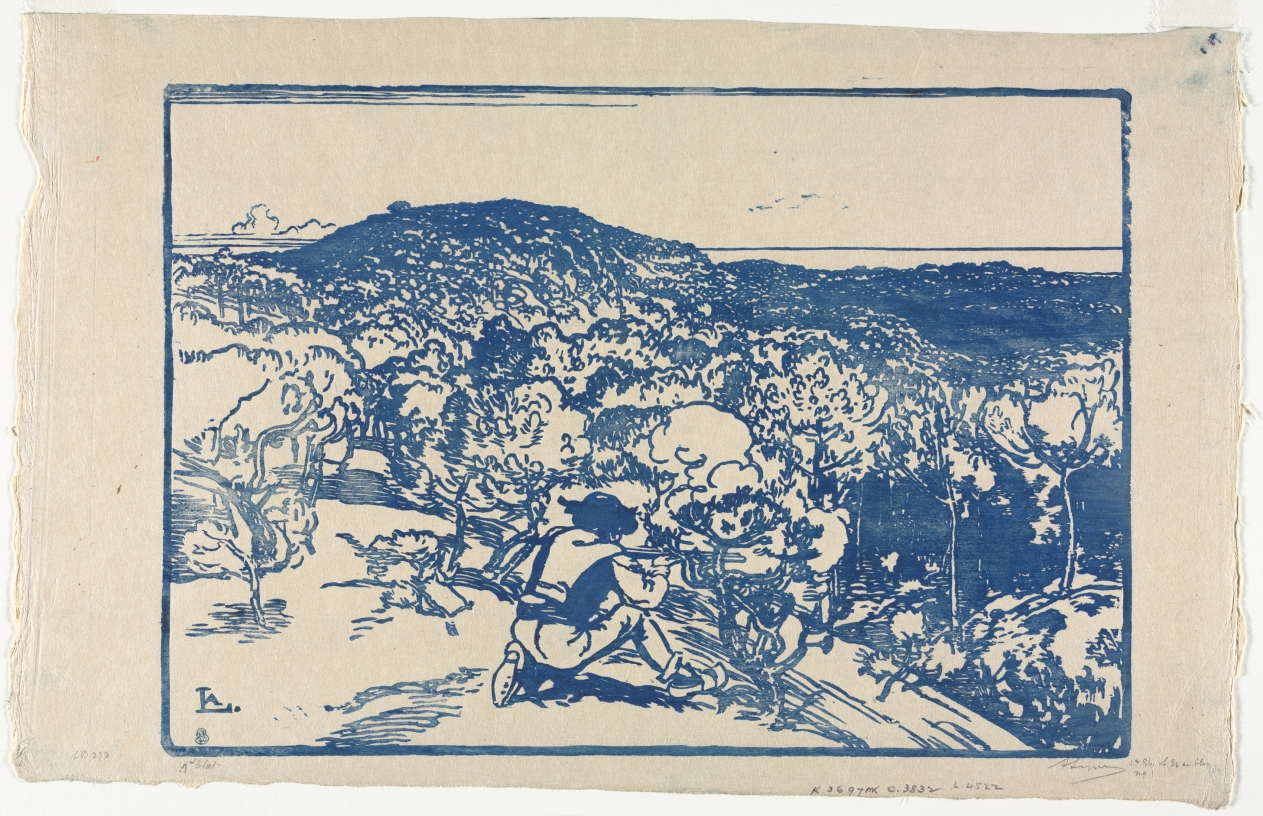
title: The Poacher, Dunes of Saint Jean de Mont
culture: France, early 20th Century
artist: Auguste Louis Lepère (French, 1849–1918)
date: 1901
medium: woodcut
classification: Print